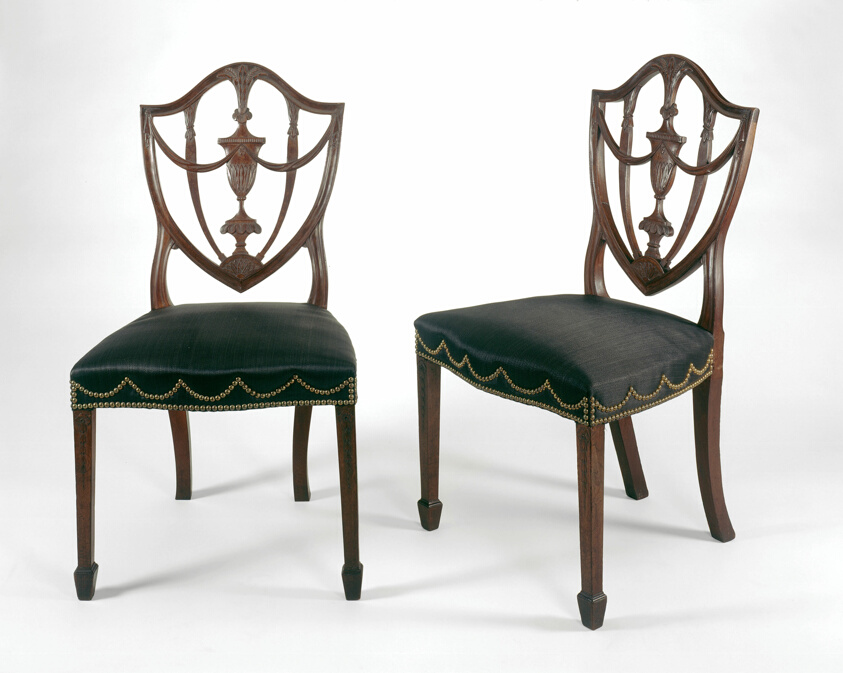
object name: Furniture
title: Pair of Side Chairs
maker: Carving attributed to Samuel McIntire (American, 1757–1811); Salem, Massachusetts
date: 1794–99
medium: Mahogany, ash, birch, and upholstery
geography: Salem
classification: seating; furniture; american decorative arts; american arts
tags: furniture, chair